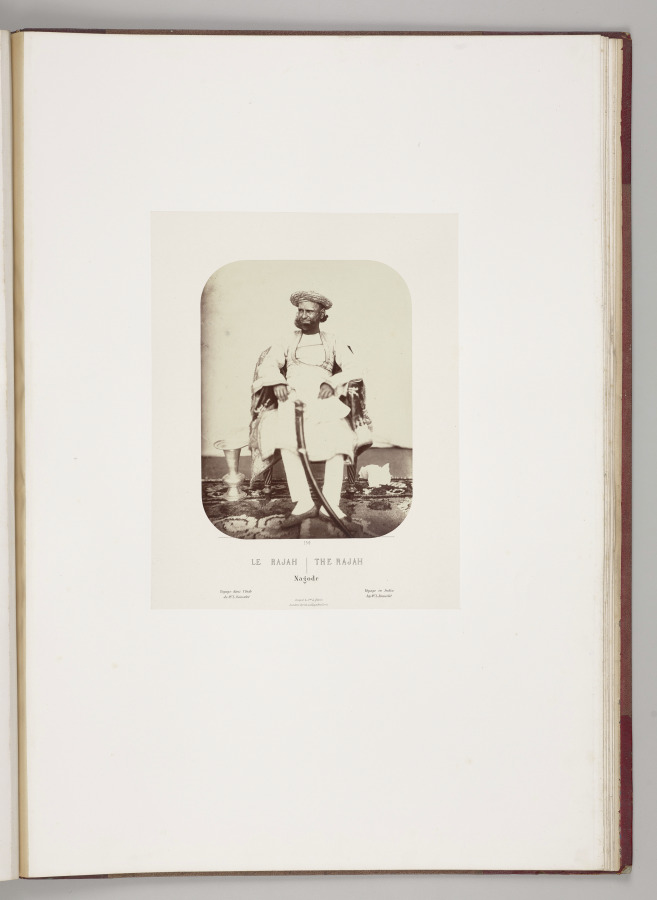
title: The Rajah, Nagode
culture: France, 19th century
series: India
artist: Louis-Théophile Marie Rousselet (French, 1845–1929)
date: 1865–68, published 1869–70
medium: Albumen print from glass plate negative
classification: Photograph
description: Concerned that his drawings did not do justice to the splendor of India’s monuments, Rousselet learned photography in India that year, a remarkable accomplishment. He proved to be a talented photographer with a sophisticated sense of composition. The scenes in this volume sweep across sites of Sultanate, Rajput, and Mughal power in northern India, from the sacred Hindu city of Varanasi on the Ganges River to Alwar in Rajasthan. Also included are several scenes of industry and portraits of Indian rulers.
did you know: Louis Rousselet described himself as a “scientific traveler” when he went to India alone at age 18 in 1863 and stayed into 1868.